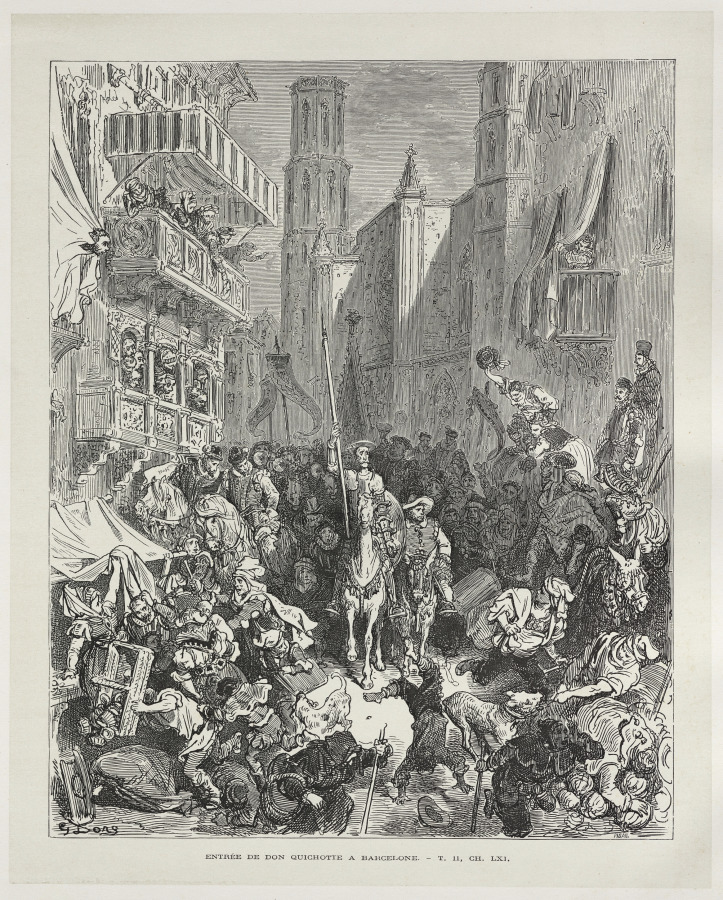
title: Don Quixote (vol II)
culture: France, 19th century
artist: Héliodore Pisan (French, 1822–1890)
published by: Hachette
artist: after Gustave Doré (French, 1832–1883)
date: 1863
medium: wood engraving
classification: Bound Volume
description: Doré wanted to illustrate the masterpieces of world literature, including Miguel de Cervantes's novel Don Quixote de la Mancha (1615). A parody of chivalric narratives popular during the 16th century, the story describes the adventures of a wandering knight, Don Quixote, and his assistant, Sancho Panza. This scene depicts Don Quixote in the enchanted cave of the Montesinos dreaming that he is shown the body of Durante, one of the greatest itinerant knights. Durante writhes on his grave, begging to be released from the burden of life. His beloved, Belerma, depicted as a ghostly shadow, hovers above the tortured Durante, holding his heart. Heliodore Joseph Pisan, a superb professional wood engraver, skillfully translated Doré's drawings into prints, retaining the dramatic tonal quality of the original. Instead of drawing on the whitened woodblock using only line, Doré used pen and ink and wash to create forms, and gouache to describe highlights. To interpret Doré's full range of grays into the black-and-white relief surface of the wood engraving, halftone effects were devised with special tools that produced very fine white lines.